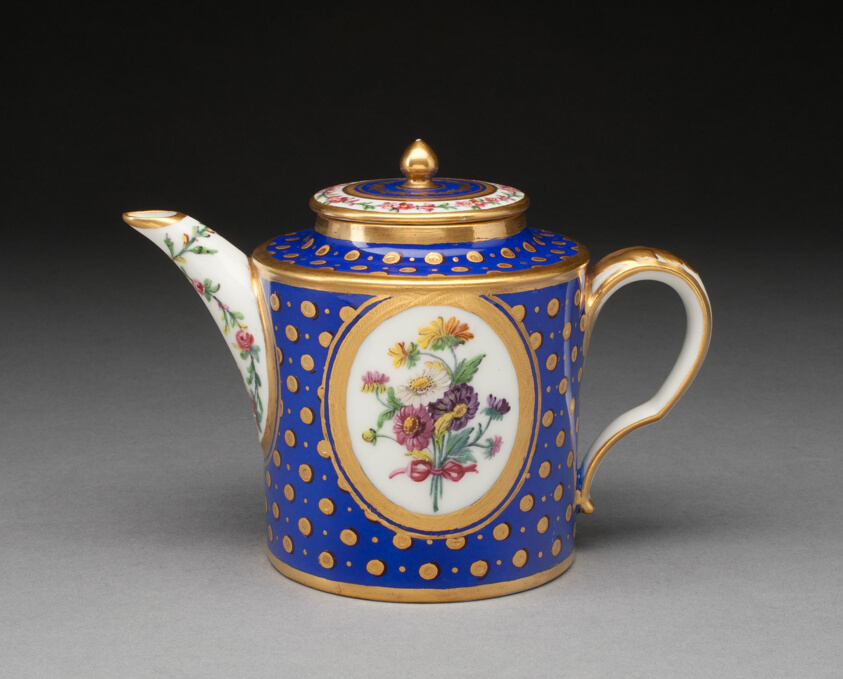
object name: Ceramics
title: Teapot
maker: Sèvres Porcelain Manufactory; French, founded 1740; Painting attributed by Buteux (French, 18th century)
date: 1788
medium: Soft-paste porcelain with polychrome enamels and gilding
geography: Sèvres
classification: teapot; teaware; porcelain; european decorative arts; ceramics